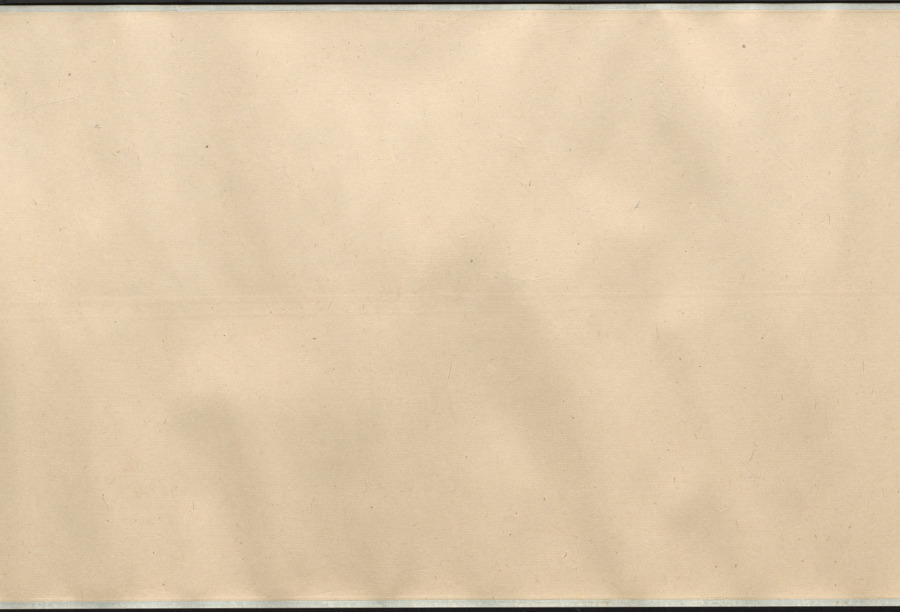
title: Rocks, Orchid, and Bamboo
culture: China, Qing dynasty (1644-1911)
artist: Shitao (Chinese, 1642–1707)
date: 1662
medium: handscroll; ink on paper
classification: Painting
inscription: Title colophon in four characters with signature and two seals on gold-flecked paper.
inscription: Artist's signature, inscription (with date of 1662), five seals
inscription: Colophon with two seals.